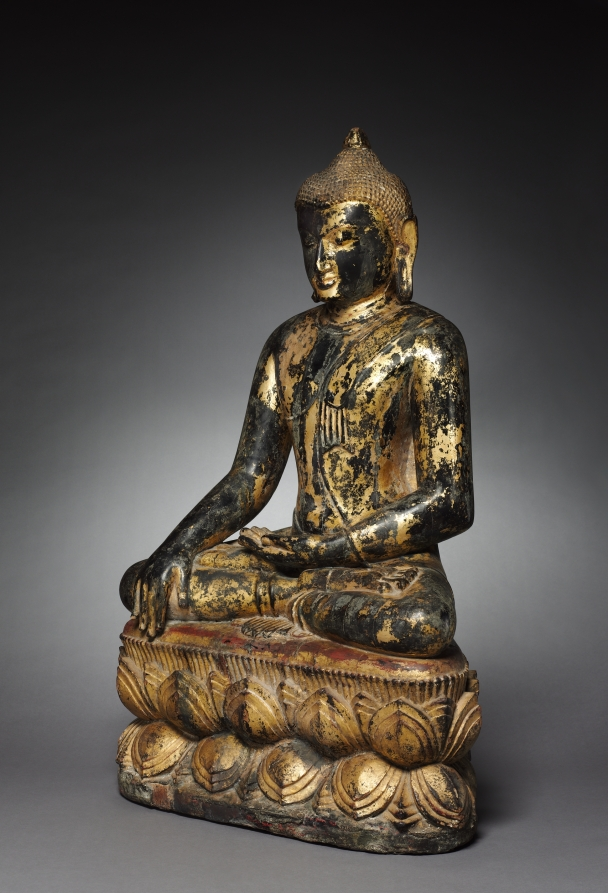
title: Seated Buddha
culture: Burma (Myanmar)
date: 1100s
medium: Gilt lacquer on solid wood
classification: Lacquer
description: This rare image of the historical Buddha Shakyamuni is shown seated with crossed legs in the position of meditation. His left hand rests on his lap, referring to his meditation under the Bodhi tree, and his right hand is in the earth-touching gesture—calling the earth to witness his enlightenment. The Buddha sits on a double lotus pedestal that indicates the presence of a transcendent being. The sculptural style is typical of sculptures made at the Buddhist site of Pagan. Sculptures such as this were installed in niches in an interior passage of a temple. As is typical of Burmese works, this sculpture was carved from a solid piece of wood. Its surface was covered in black lacquer and then gilded; a great deal of the gilding remains intact. Because lacquer is an easily perishable material, works of this type and size are exceedingly rare; this sculpture is one of the best extant examples.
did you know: The parallel lines with heart-shaped ends near the Buddha's ankles are the rippling pleats of his garment's hem.